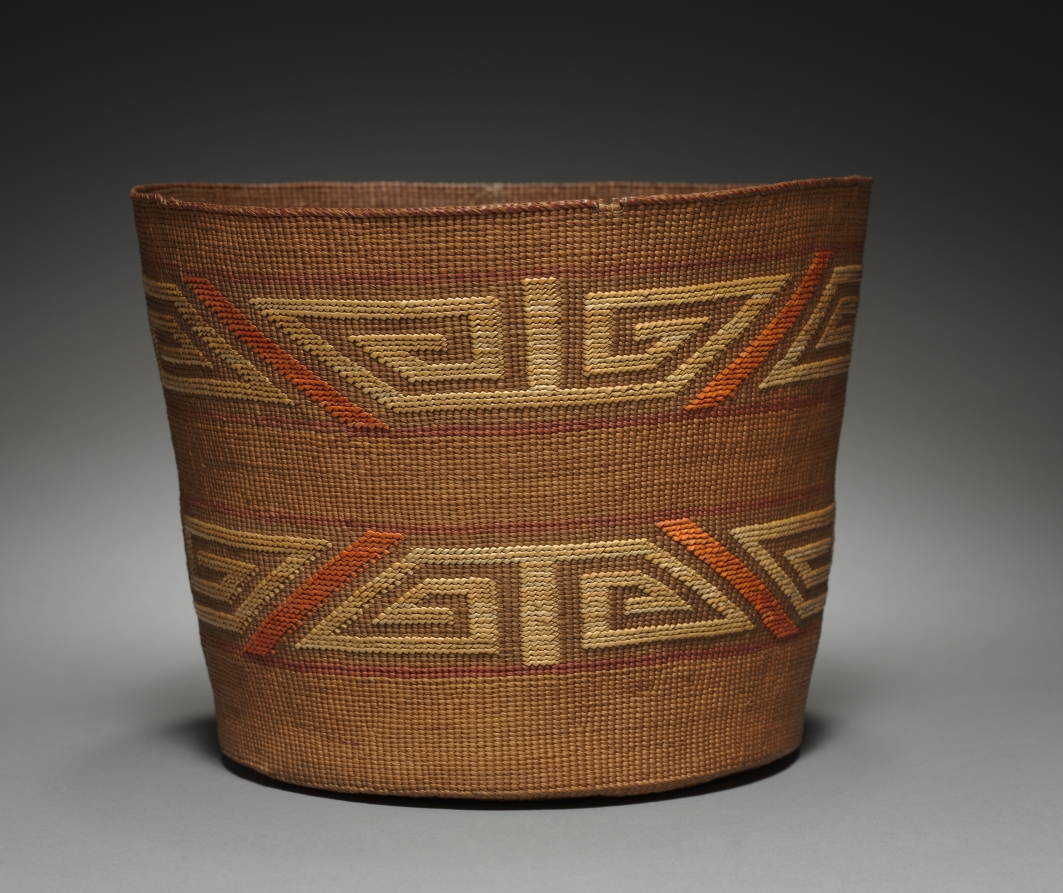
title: Bowl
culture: Northwest Coast, Tlingit, 20th century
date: before 1942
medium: twined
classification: Basketry